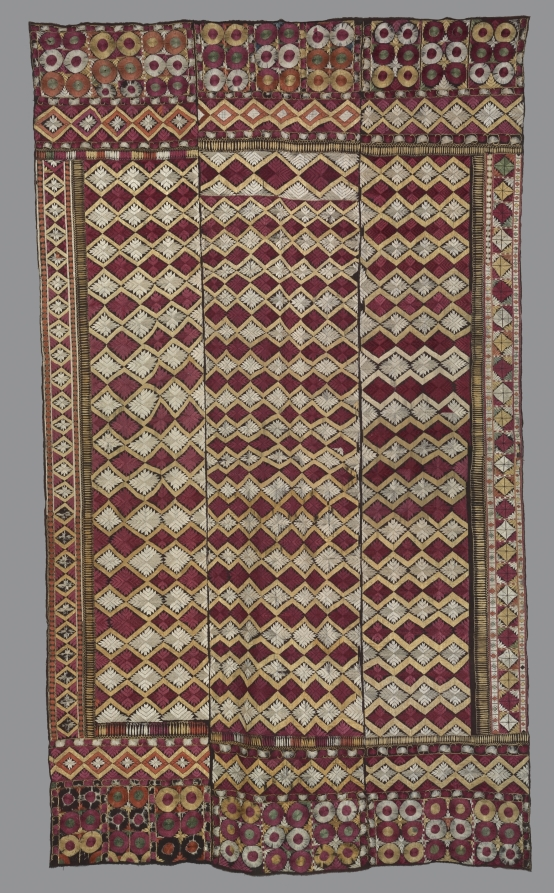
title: Hanging (Phulkari work)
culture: India, Punjab, Late 19th century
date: c. 1875–1900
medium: embroidered silk on cotton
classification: Embroidery